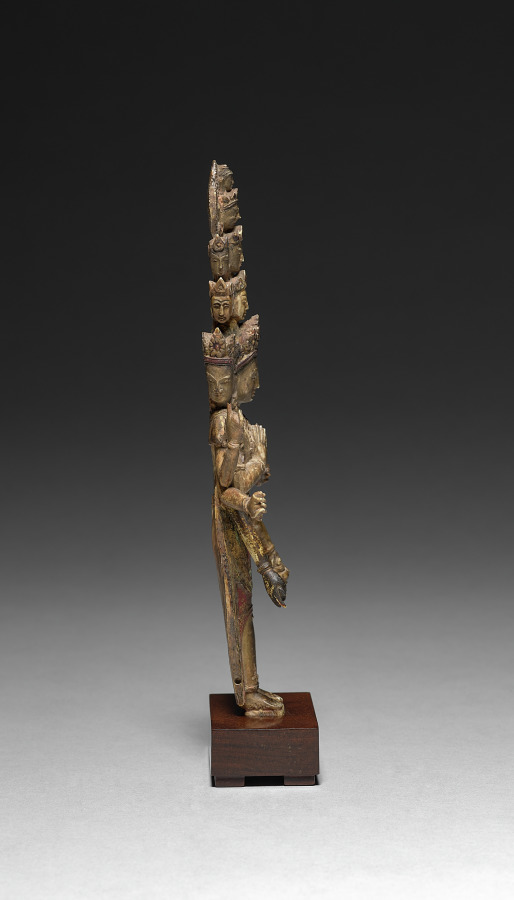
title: Eleven-Headed Avalokitesvara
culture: Nepal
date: 1500s–1600s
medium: painted ivory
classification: Ivory